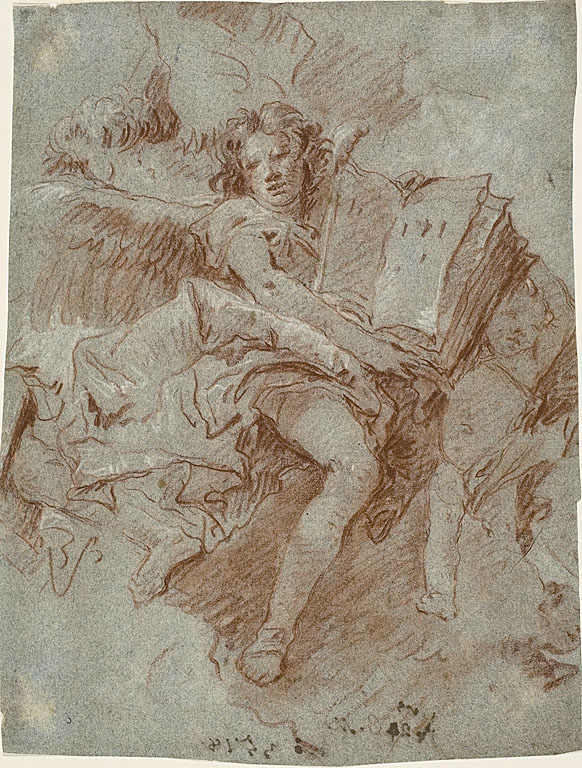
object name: Drawing and Watercolor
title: An Angel with a Book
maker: Giovanni Domenico Tiepolo (Italian, 1727-1804)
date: late 1740s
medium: Red chalk, heightened with traces of white chalk, on blue laid paper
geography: Italy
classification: chalk; drawings (visual works); prints and drawing